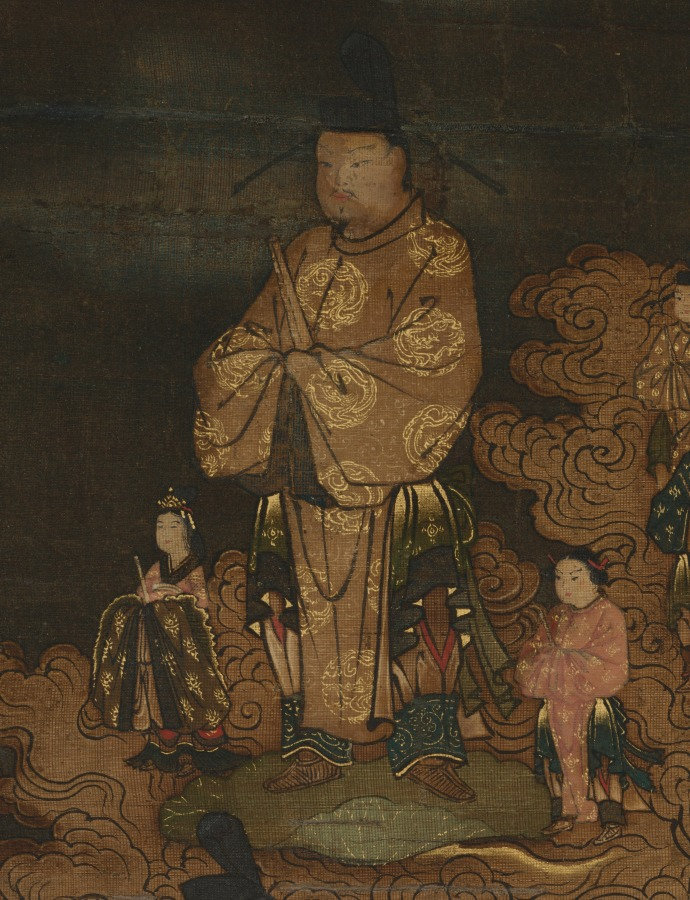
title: Descent of the Nine Luminaries and the Seven Stars at Kasuga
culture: Japan, Nanbokuchō period (1336–92)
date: mid- to late 1300s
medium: Hanging scroll; ink, color, gold and cut gold on silk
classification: Painting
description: This medieval religious painting shows celestial beings descending from the heavens into the Kasuga Shrine, a major religious site in Japan's ancient capital, Nara. The moon and the Kasuga mountain range appear in the uppermost portion of the painting, as does a red shrine entrance gate, or torii. In the upper part of the painting, figural representations of the stars in the constellation known as the Big Dipper in the West descend from right to left on cloud banks. In the lower part, the Nine Luminaries (Sanskrit: Navagraha) that emerged from the Vedic tradition—the sun and moon; the planets Jupiter, Mars, Saturn, Venus, and Mercury; and personifications of the fluctuating lunar nodes—descend in similar fashion. The painting uses the "deities in descent" scheme originating in China, as well as the original Buddhist form mandala (Japanese: honjibutsu mandarazu) format prevalent in medieval Japanese Shinto-Buddhist painting, to generate an image connected to the worship of celestial bodies in Esoteric Buddhism.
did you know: A 19th-century copy of this painting in ink and light color exists at the Kyoto City University of Arts.